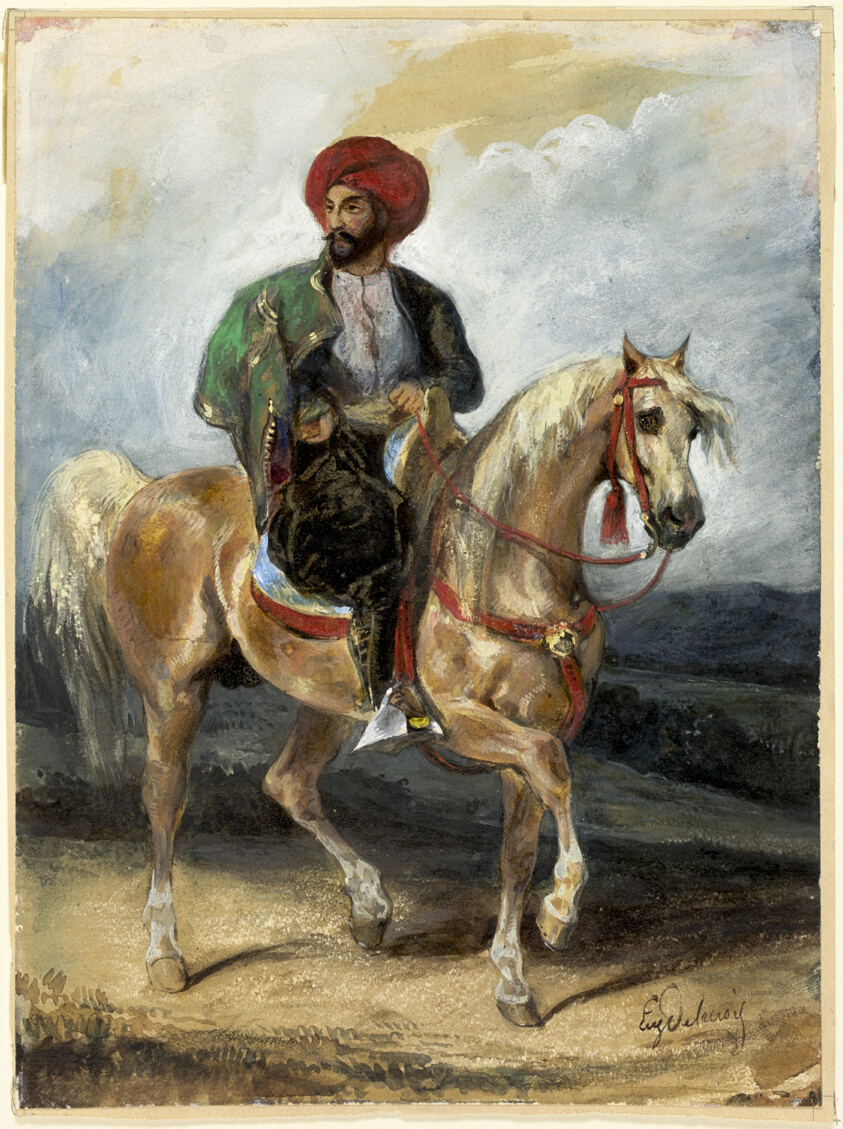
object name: Drawing and Watercolor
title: The Turkish Rider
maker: Eugène Delacroix (French, 1798-1863)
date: c. 1834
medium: Gouache and watercolor, with scraping, selectively gum-varnished, on cream wove paper, laid down on tan wove paper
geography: France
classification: watercolor; drawings (visual works); prints and drawing